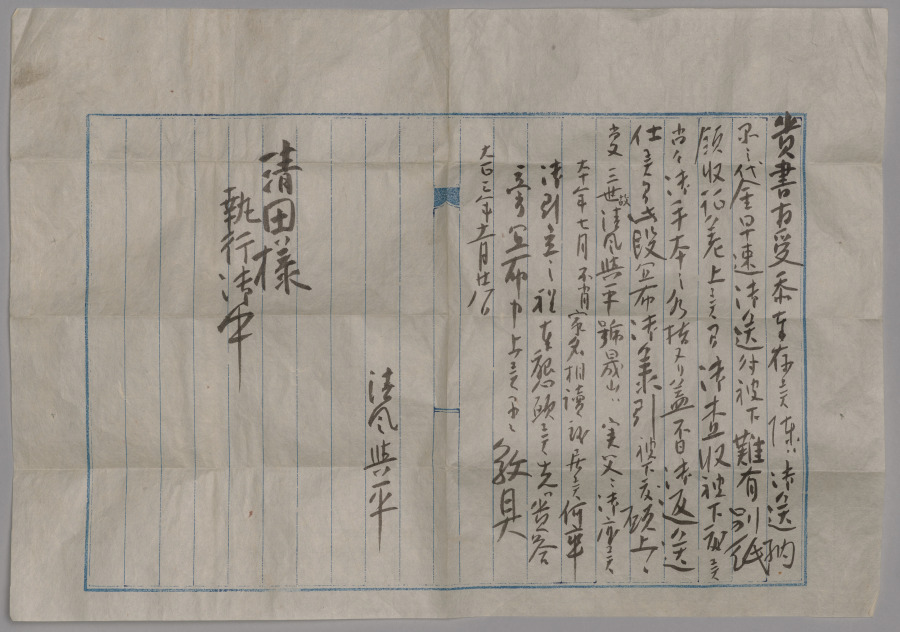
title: Water Container with Peonies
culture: Japan, Meiji period (1868–1912)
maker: Seifū Yohei III (Japanese, 1851–1914)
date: 1900–1914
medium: Porcelain with molded and carved design, green glaze, and black lacquered lid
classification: Ceramic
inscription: 清風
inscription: 帝室技芸員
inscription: 清風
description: This ceramic is an especially accomplished example of Yohei III’s combination of an allover translucent colored glaze with molded and carved designs. It features the peony as its primary motif. The water container, or mizusashi, has a green glaze, and its design takes into consideration the rounded shape and the seated position of the host and guests. It begins low on the body with a flower just beginning to open and continues with another flower a bit higher up, with its petals fully extended and beginning to open outward. It finishes with a flower in full bloom, petals and leaves unfurled and spread outward from the center, now occupying almost the entire surface. The water container once belonged to the Hosokawa family, whose go-between corresponded with Yohei IV about the piece. Yohei IV thanked them for their payment and requested that despite his father’s death in the previous year, they continue to favor the studio with their orders. The letter and its envelope, as well as an auction tag, remain with the object.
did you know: This water container may also serve as a site for cultural reckoning, as when the life cycle of a flower prized in East Asia as a symbol of wealth is displayed across a Japanese chanoyu vessel whose glaze is associated with the seats of power in China and Korea.